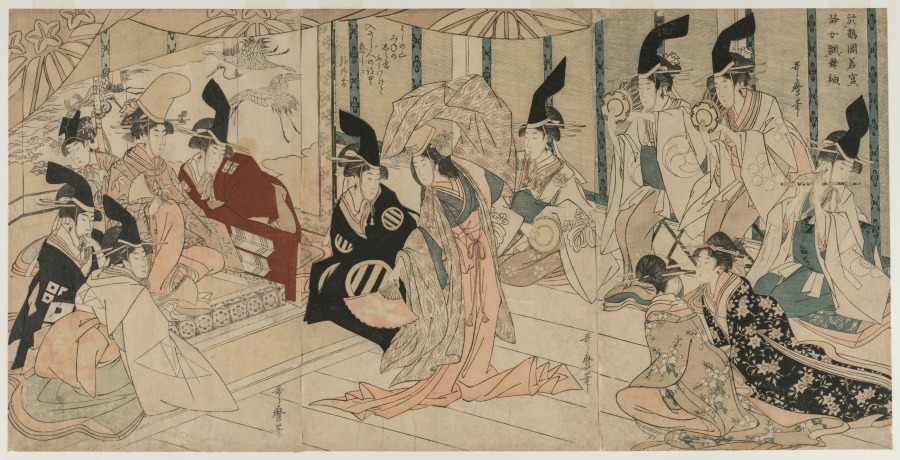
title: Scene Adapted from the play The Treasury of Loyal Retainers (Chushingura)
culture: Japan, Edo period (1615–1868)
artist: Kitagawa Utamaro (Japanese, c. 1754–1806)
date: late 1790s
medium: color woodblock print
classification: Print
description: This is a scene from the most popular work in Japanese theater, The Treasury of Loyal Retainers. A tale of loyalty and revenge, it is based on a historical event that took place during 1701-1703.